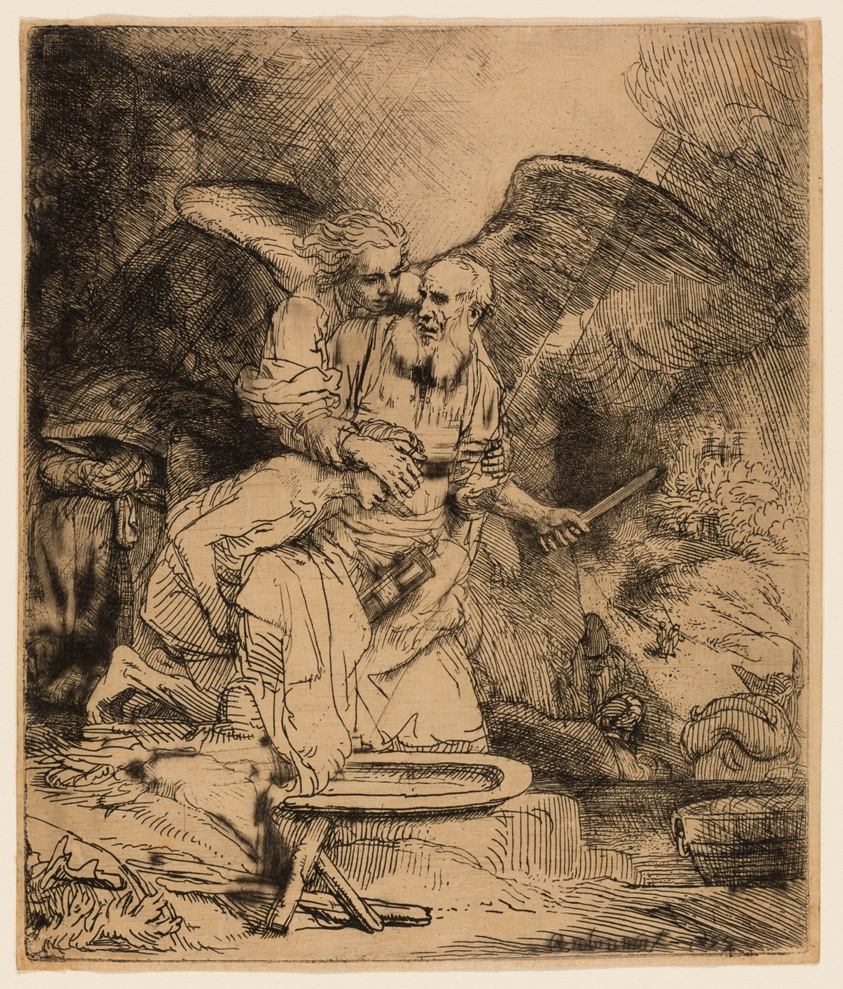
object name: Print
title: Abraham's Sacrifice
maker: Rembrandt van Rijn (Dutch, 1606-1669)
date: 1655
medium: Etching and drypoint on ivory Japanese paper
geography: Holland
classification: etching; print; prints and drawing; paper; drypoint